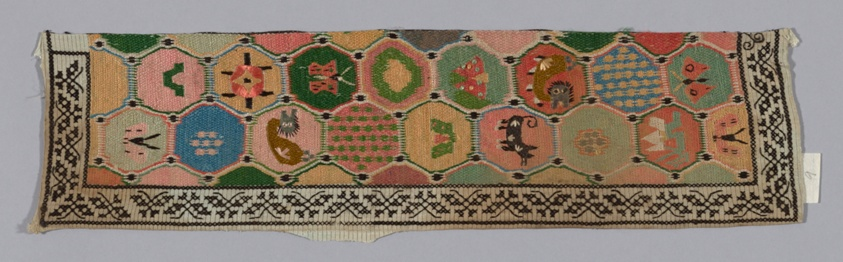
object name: Costume and Accessories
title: Trouser Band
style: qing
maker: Han-Chinese (China)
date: Qing dynasty (1644–1911), 1875/1900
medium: Design of dragons, butterflies, dogs, black and white border, embroidered on gauze.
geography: China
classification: costume - embroidery; needlework (visual works); weaving; costume